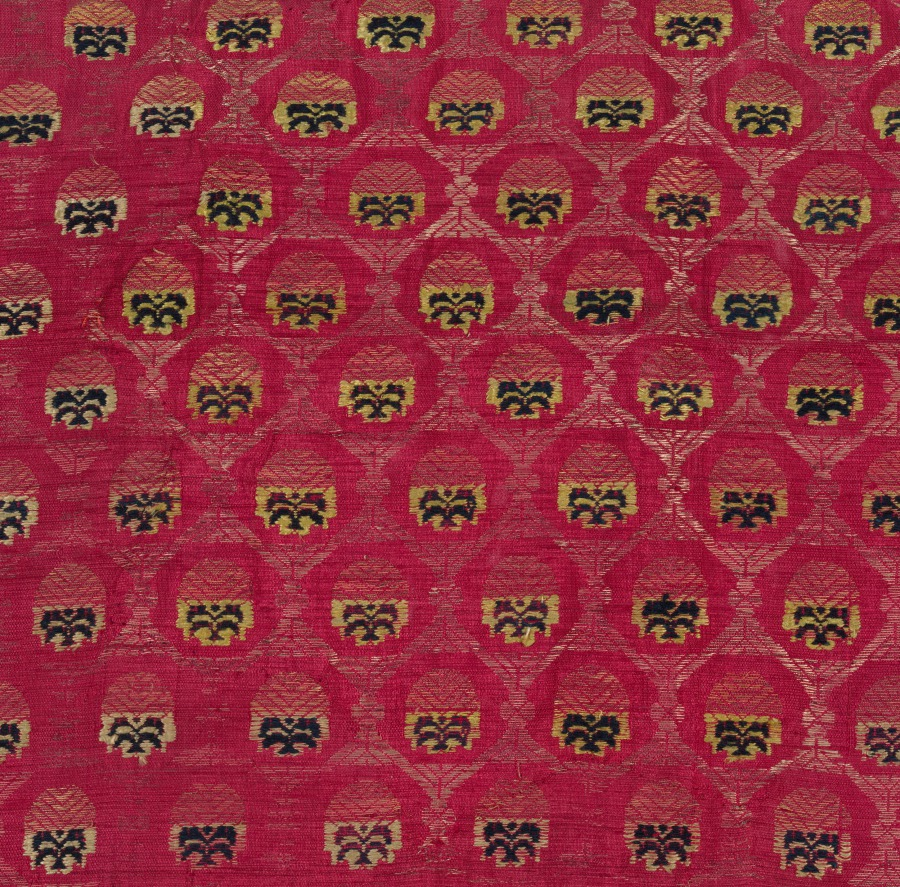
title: Brocade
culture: India, Benares ?, 18th-19th century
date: 1700s - 1800s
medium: brocade, Kimkhwab; silk and cotton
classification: Textile